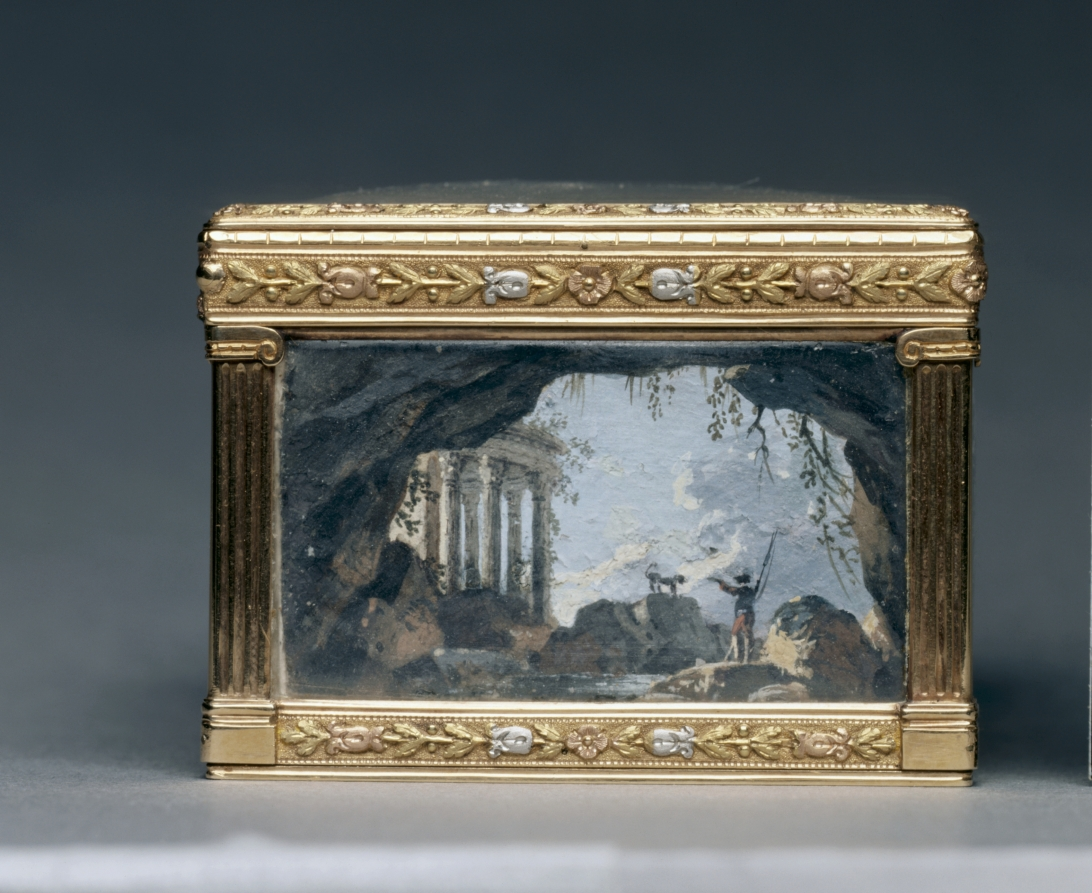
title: Rectangular Box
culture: France, 19th century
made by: Alexandre Leferre (French)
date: c. 1840–1850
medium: gouache miniatures mounted on gold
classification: Miscellaneous